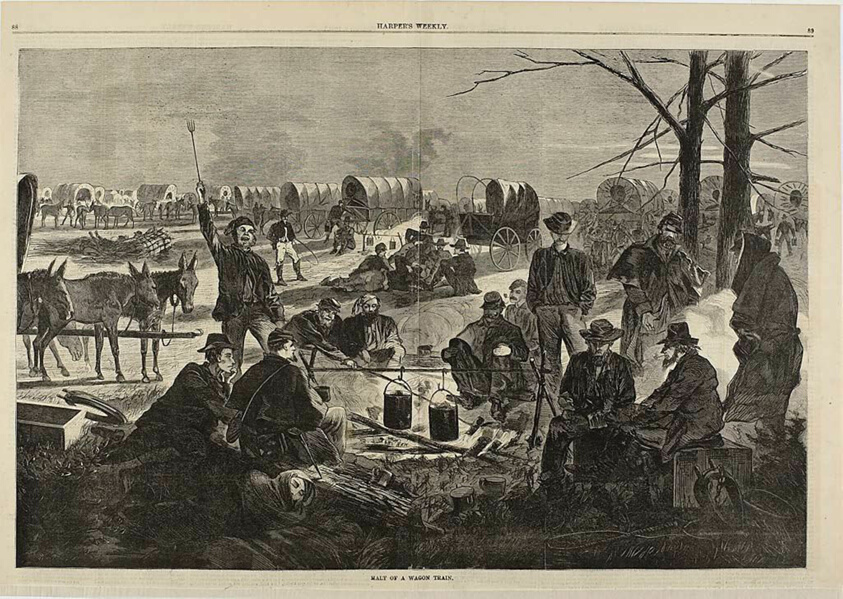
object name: Print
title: Halt of a Wagon Train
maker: Winslow Homer (American, 1836-1910); published by Harper's Weekly (American, 1857-1916)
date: published February 6, 1864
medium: Wood engraving on paper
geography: United States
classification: wood engraving; print; prints and drawing